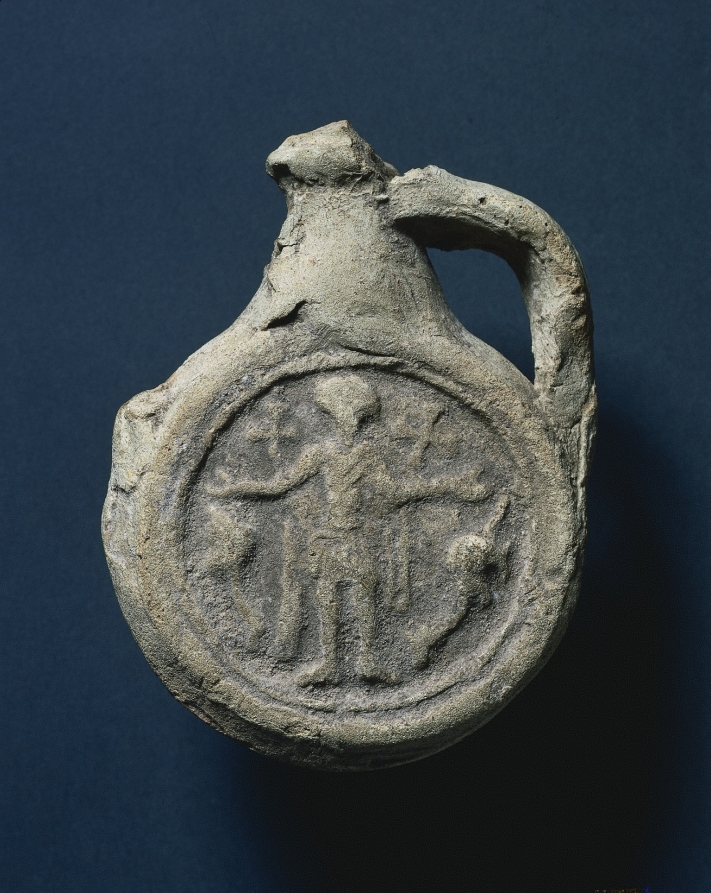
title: Pilgrim's Flask with Saint Menas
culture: Egypt, Coptic period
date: 400–600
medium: terracotta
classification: Ceramic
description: These flasks bear the image of Saint Menas, an early martyr of the Christian Church whose shrine was in the desert southwest of Alexandria in Egypt. These flasks were probably used by pilgrims to hold oil taken from the lamp that burned over this saint's tomb. Probably manufactured near the shrine, pilgrim's flasks often bear decorations hinting at their place of origin, as is the case here.